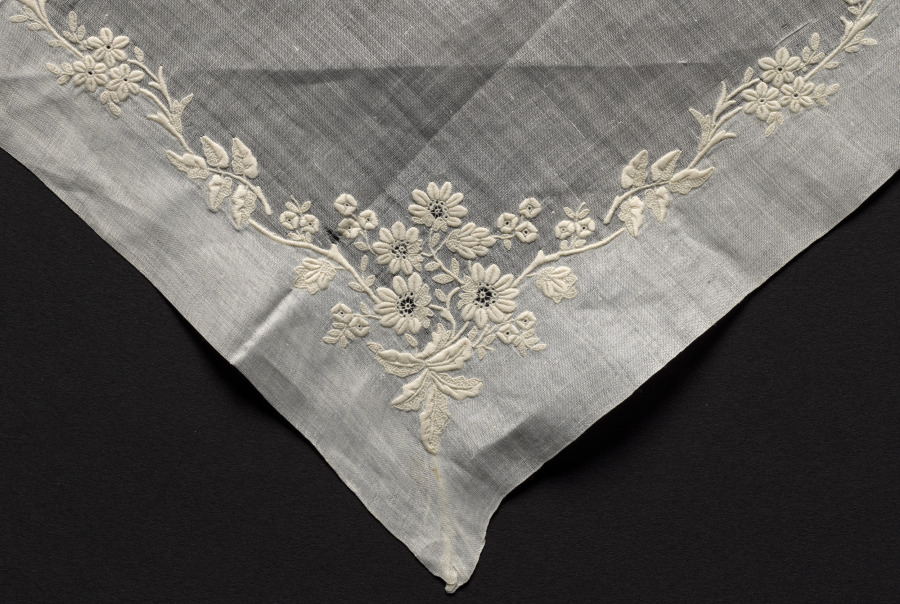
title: Embroidered Handkerchief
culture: Switzerland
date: 1880–99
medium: Plain weave linen: embroidered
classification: Embroidery